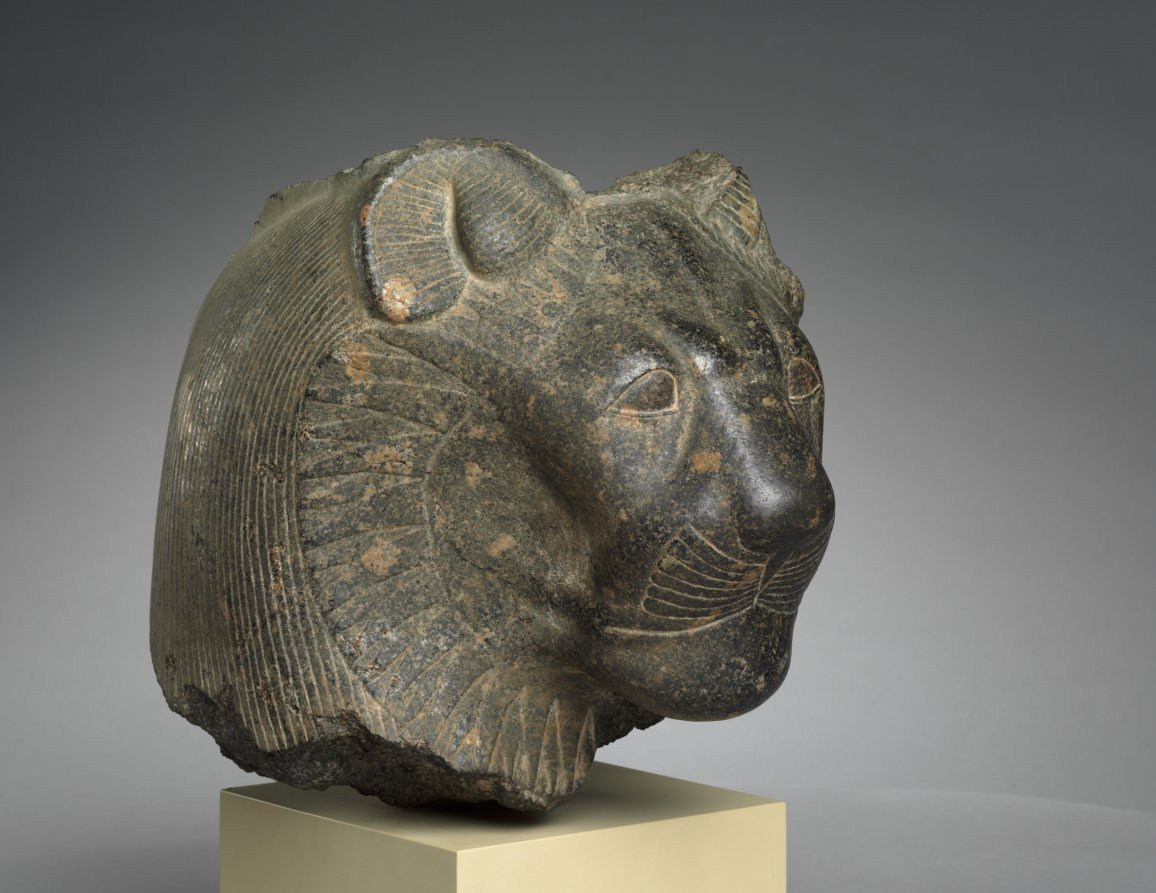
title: Head of Sekhmet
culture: Egypt, Thebes(?), New Kingdom (1540–1069 BCE), Dynasty 18, reign of Amenhotep III (1390–1352 BCE)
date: c. 1391–1353 BCE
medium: granodiorite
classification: Sculpture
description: This lioness head once belonged to a grand statue of the goddess Sekhmet, "the powerful one," probably seated and wearing a tight dress. Possibly appealing to her healing aspect, Pharaoh Amenhotep III, often described as “beloved of Sekhmet,” commissioned and dedicated hundreds of large granodiorite Sekhmet sculptures in his Theban mortuary temple. Thus, this head likely comes from Thebes, perhaps later moved across the Nile—like many such sculptures—to the temple of Mut, a related deity, at Karnak. Behind her stylized ruff, Sekhmet wears a wig, once crowned with a sun disk and uraeus, the stylized cobra symbolizing royal or divine power.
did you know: Amenhotep III may have dedicated 730 statues of Sekhmet, two for each day of the year.